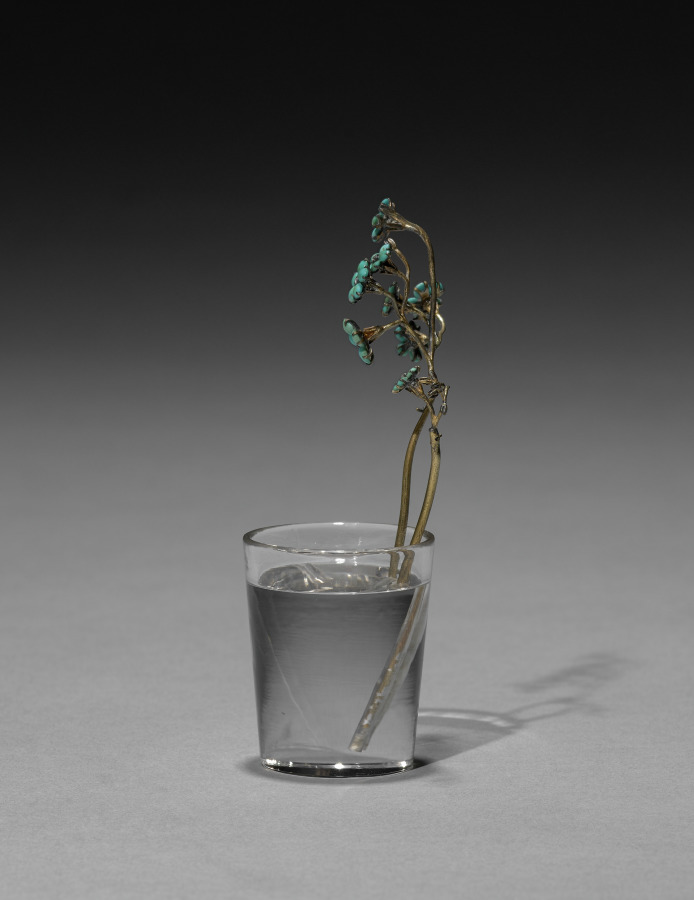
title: Flower Study of Forget-Me-Nots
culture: Russia, St. Petersburg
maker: House of Fabergé (Russian, 1842–1918)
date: c. 1885–1915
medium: turquoise, diamonds, rock crystal, silver gilt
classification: Miscellaneous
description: These delicate flowers, resembling a bouquet of forget-me-nots, are composed of finely rounded turquoise stones set around rose-cut diamonds on silver-gilt stems placed in rock crystal pots. Fabergé’s inspiration for his flower studies is said to have come from the floral brooches of precious stones that were made in the 1700s for Catherine the Great as well as from the Japanese art of flower arranging, known as ikebana. Fabergé’s flower studies were given as intimate gifts to friends by the tsarina and others in the court. She also liked to take them around to wherever the imperial family was residing as a reminder of spring during the harsh Russian winters.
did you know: The stems of Fabergé’s flower studies are set into little basins carved from rock crystal to resemble pots of water.